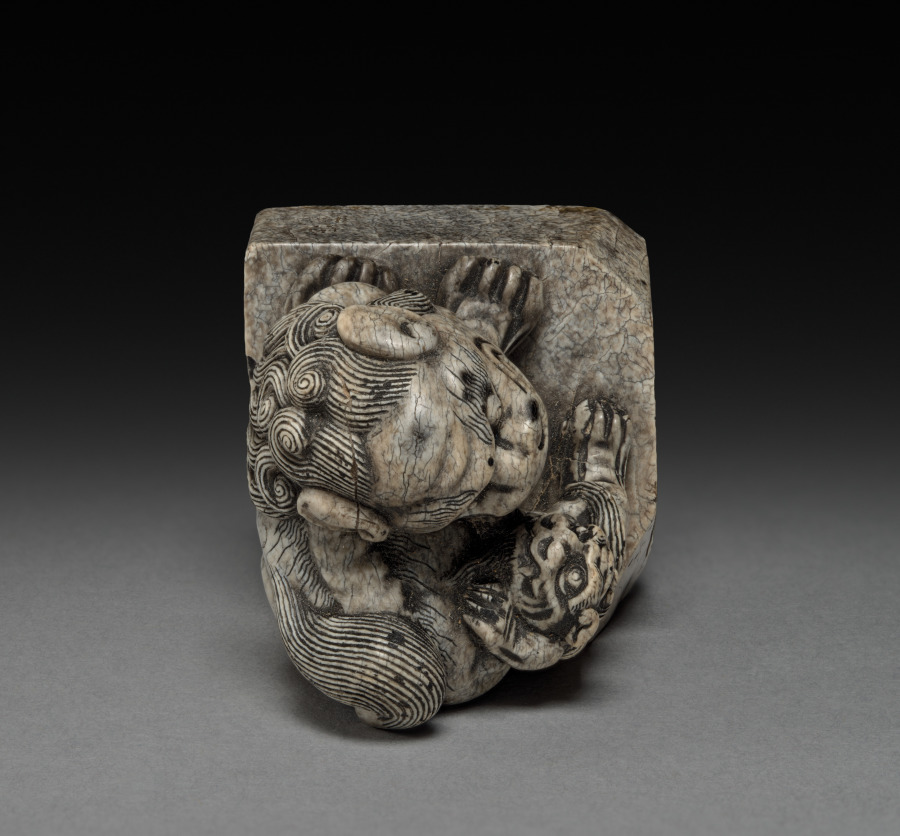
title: Seal: Lion and Cub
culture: China, Qing dynasty (1644-1911)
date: 1700s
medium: stone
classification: Stone